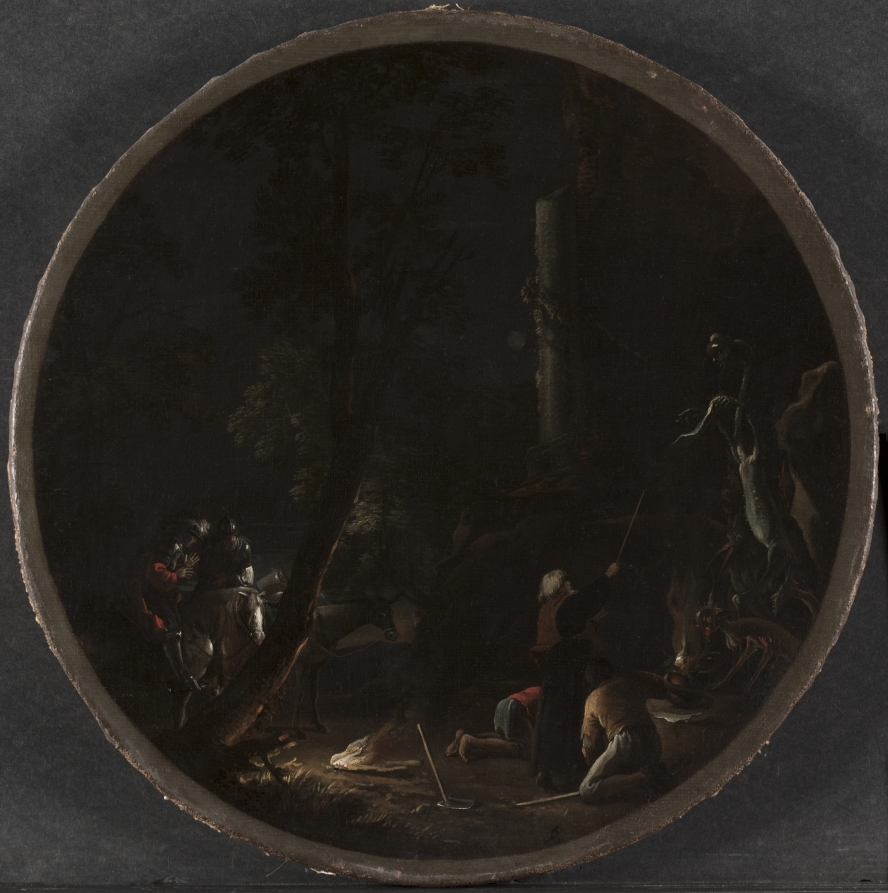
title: Scenes of Witchcraft: Night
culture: Italy, 17th century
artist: Salvator Rosa (Italian, 1615–1673)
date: c. 1645–1649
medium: oil on canvas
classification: Painting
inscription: Signed: "SR [monogram]"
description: In the pitch black of night, two groups of men are gathered in a forest. To the left, travelers apprehensively pause to watch a magician conjure terrifying apparitions. Since the Middle Ages, necromancy, the act of communing with the dead, was associated with male sorcerers. In Rosa's painting, the wizened necromancer who stands tall and resolute directly below a classical column is reminiscent of Moses, a predecessor to Renaissance depictions of sorcerers. Rosa's learned magicians not only invoke associations with philosophers and intellects, but they would have also referred to the artist himself and the intellectual elite with whom he associated in Florence. Just as a powerful magician could conjure strange creatures with his wand, so too could Rosa shape a strange world with his originality, intelligence, and the skillful use of paint and brush.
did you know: The artist chose the painting's shape to reference the foundational role of the circle in practicing magic.